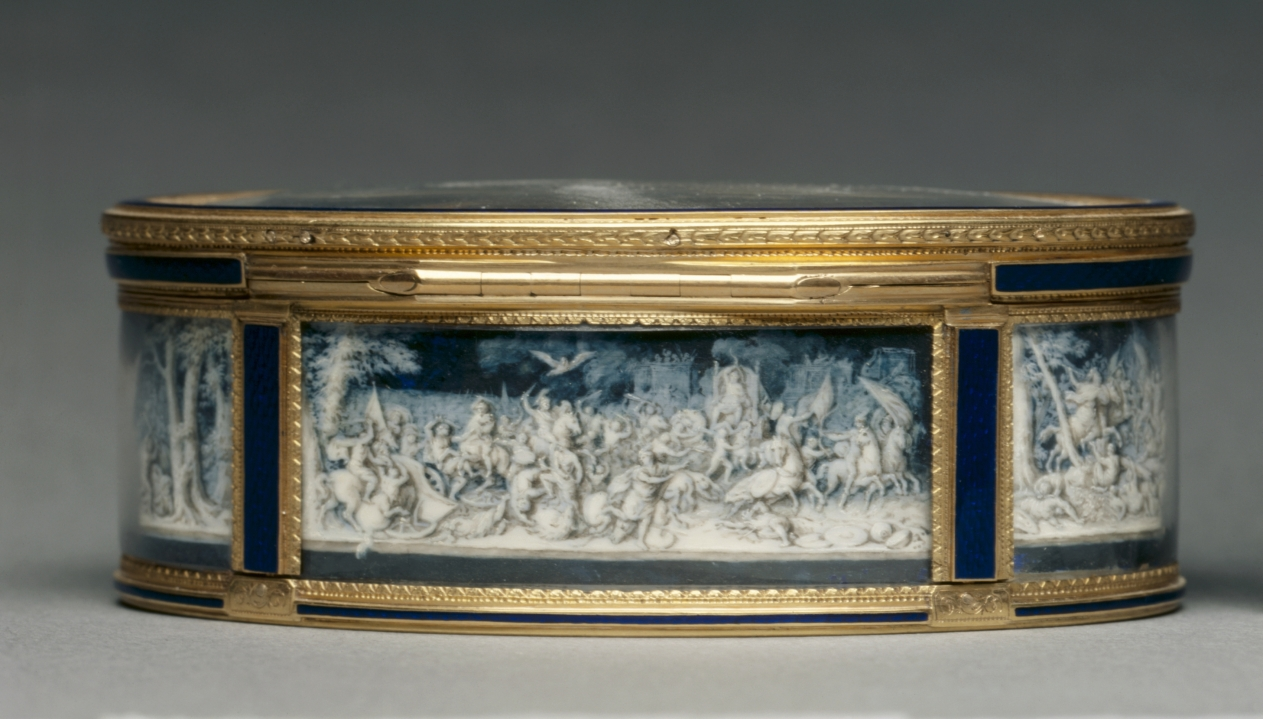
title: Snuff Box (Tabatière)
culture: France, 18th century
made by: Pierre Marie Gault De Saint-Germain (French, 1754–1842)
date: 1779–80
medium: gold and enamel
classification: Miscellaneous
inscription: [Warden's mark for Paris, 1779-1780, inside bottom; inside cover]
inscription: [Illegible maker's mark, inside bottom; inside cover]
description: Decorated with images derived from ancient Greek and Roman history in the style of cameos, intricately carved gemstones, this box evokes the rising neoclassical imagery in France. The scenes on the box recount several key events in the life of Alexander the Great. The enameled works were inspired by a series of prints by Sébastien Leclerc which drew from a series of paintings by Charles Le Brun.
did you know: The original series painted by Charles Le Brun, The Battles of Alexander (Les Batailles d’Alexandre) (1600s), was commissioned by King Louis XIV of France.